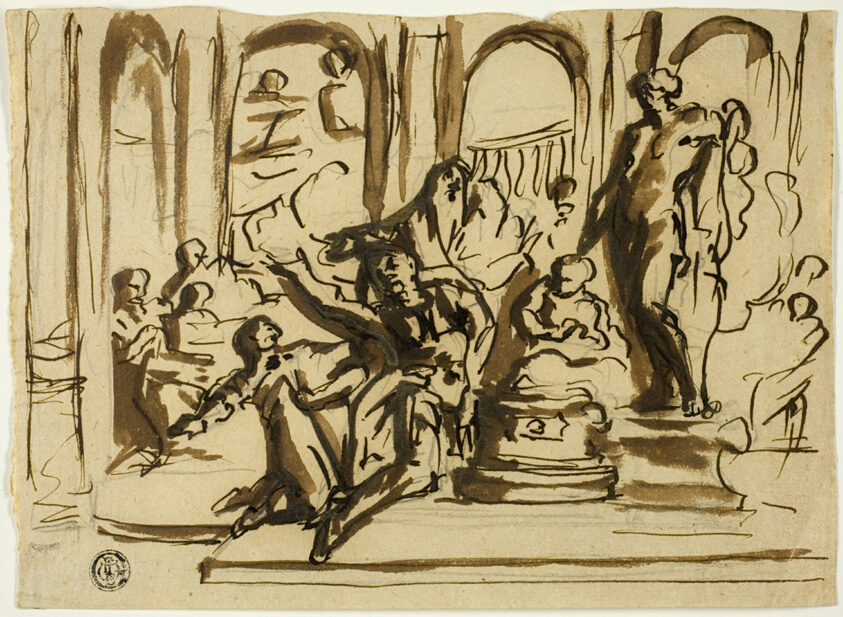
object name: Drawing and Watercolor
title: Sacrificial Scene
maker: Jan Luyken (Dutch, 1649-1712); or Abraham Jansz. van Diepenbeeck (Flemish, 1596-1675)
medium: Pen and brown ink, and brush and brown wash, over graphite, on tan laid paper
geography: Holland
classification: pen and ink drawings; drawings (visual works); prints and drawing